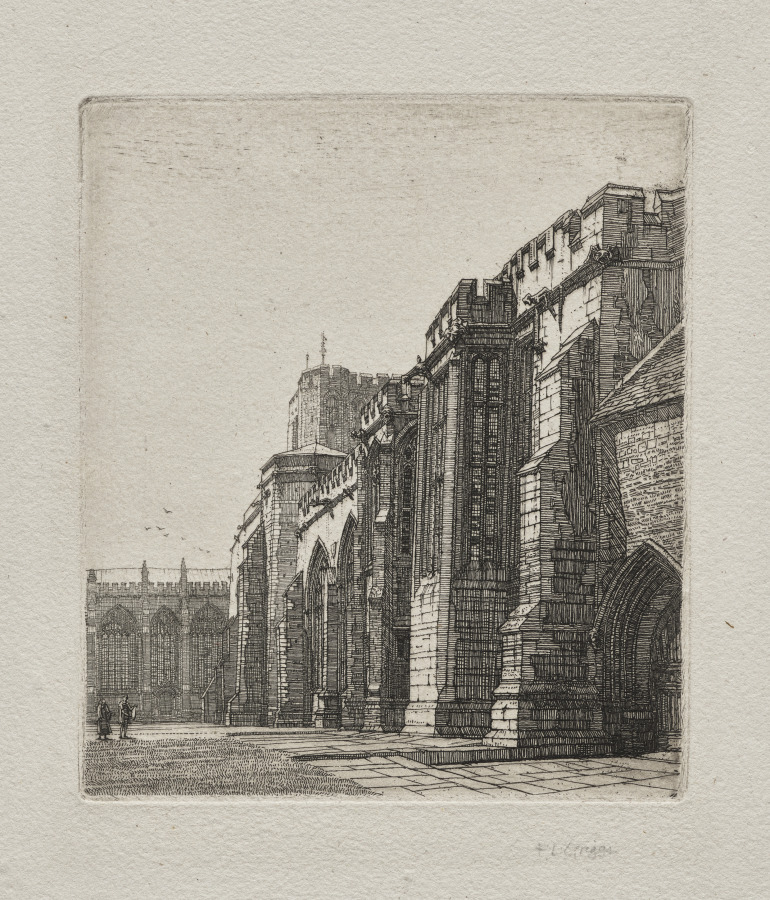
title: The Palace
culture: England, 20th century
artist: Frederick Landseer Maur Griggs (British, 1876–1938)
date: 1921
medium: etching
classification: Print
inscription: signed in graphite, lower right margin: F.L. Griggs